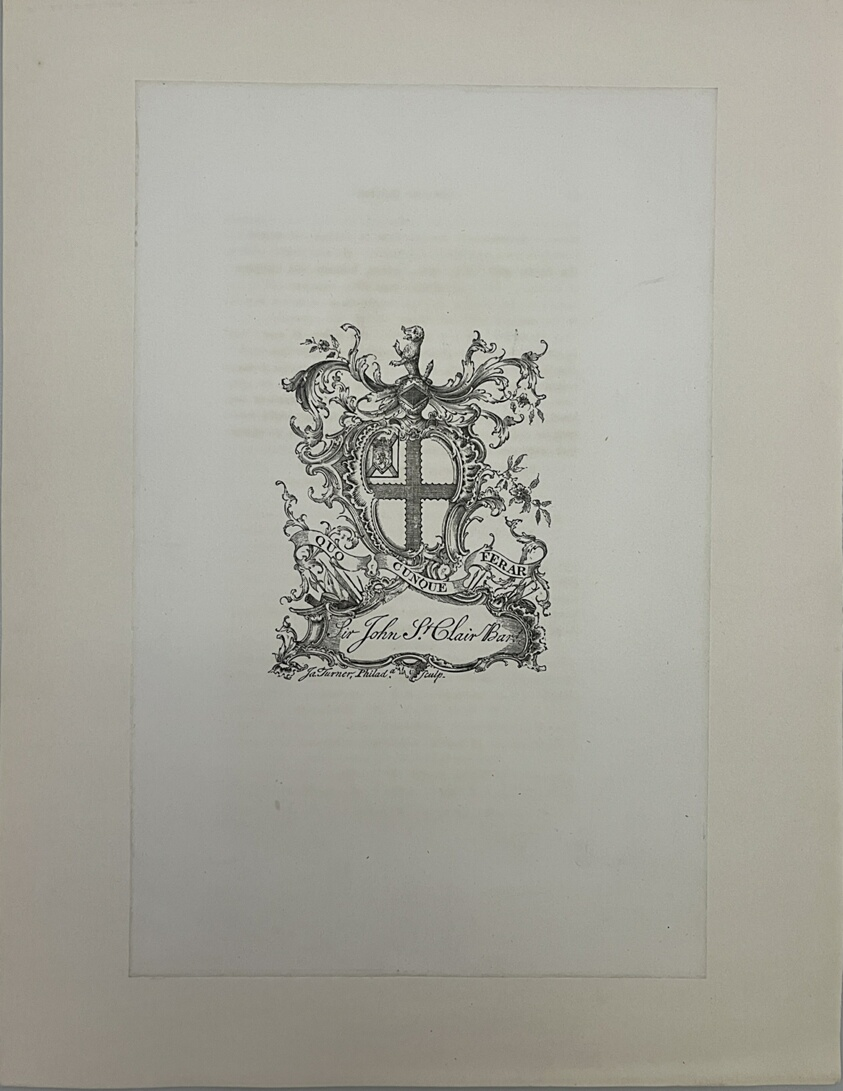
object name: Print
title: Sir John St. Clair Bart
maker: J. Turner (American, 19th century)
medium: Etching on paper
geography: United States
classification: reproduction; print; prints and drawing